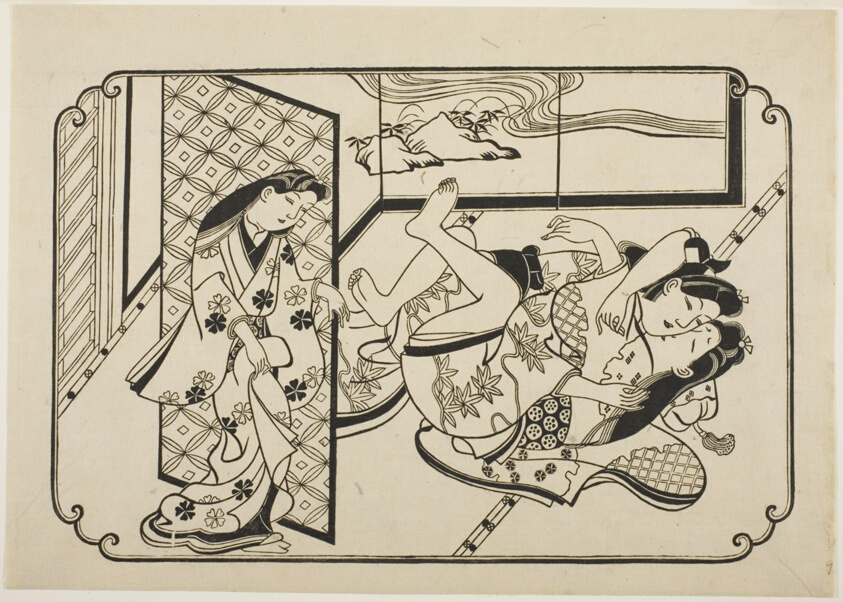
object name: Print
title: A Courtesan with Her Client, the first sheet of an untitled erotic picture album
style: Japanese (culture or style)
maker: Hishikawa Moronobu (Japanese, (?)-1694)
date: c. 1673/81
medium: Woodblock print; sumizuri-e, oban yoko-e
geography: Japan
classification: woodblock print; print; asian art; woodblock